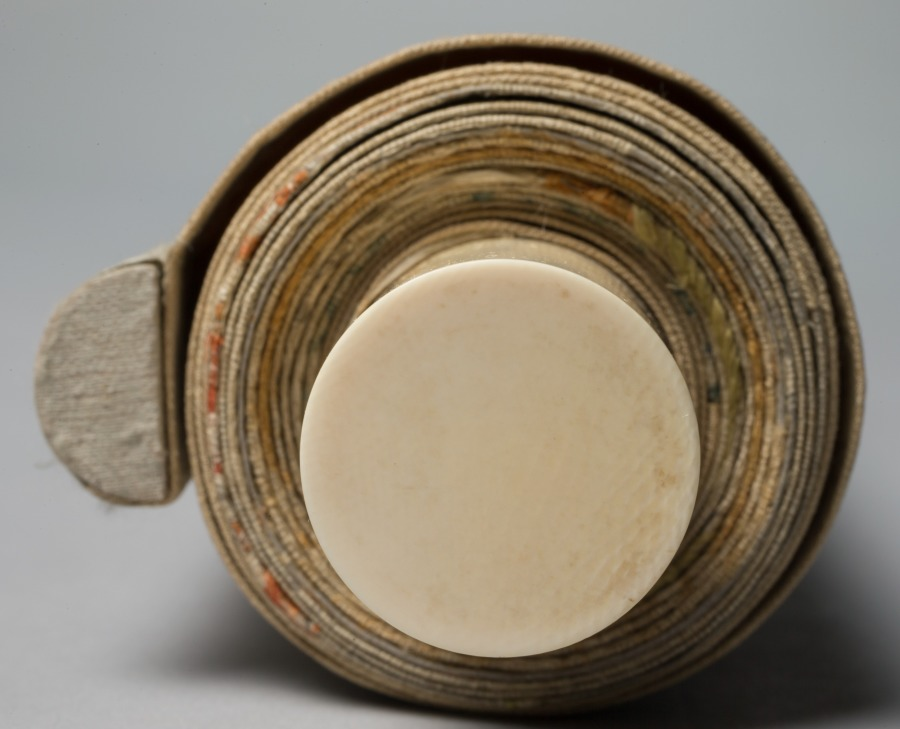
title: Courtesan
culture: Japan, Edo period (1615–1868)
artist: Matsuno Chikanobu (Japanese, active 1716–35)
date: 1716–35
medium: hanging scroll; ink and color on paper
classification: Painting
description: A glamorous courtesan sports an outer robe decorated with large roundels featuring plant motifs including iris and bush clover. Little is known about the life and artistic training of the painter Matsuno Chikanobu, an ukiyo-e artist who painted in a style strongly reminiscent of that of the Kaigetsudō studio. Many of his known paintings are on silk, and executed with high quality pigments, indicating that his primary clientele were wealthy individuals.